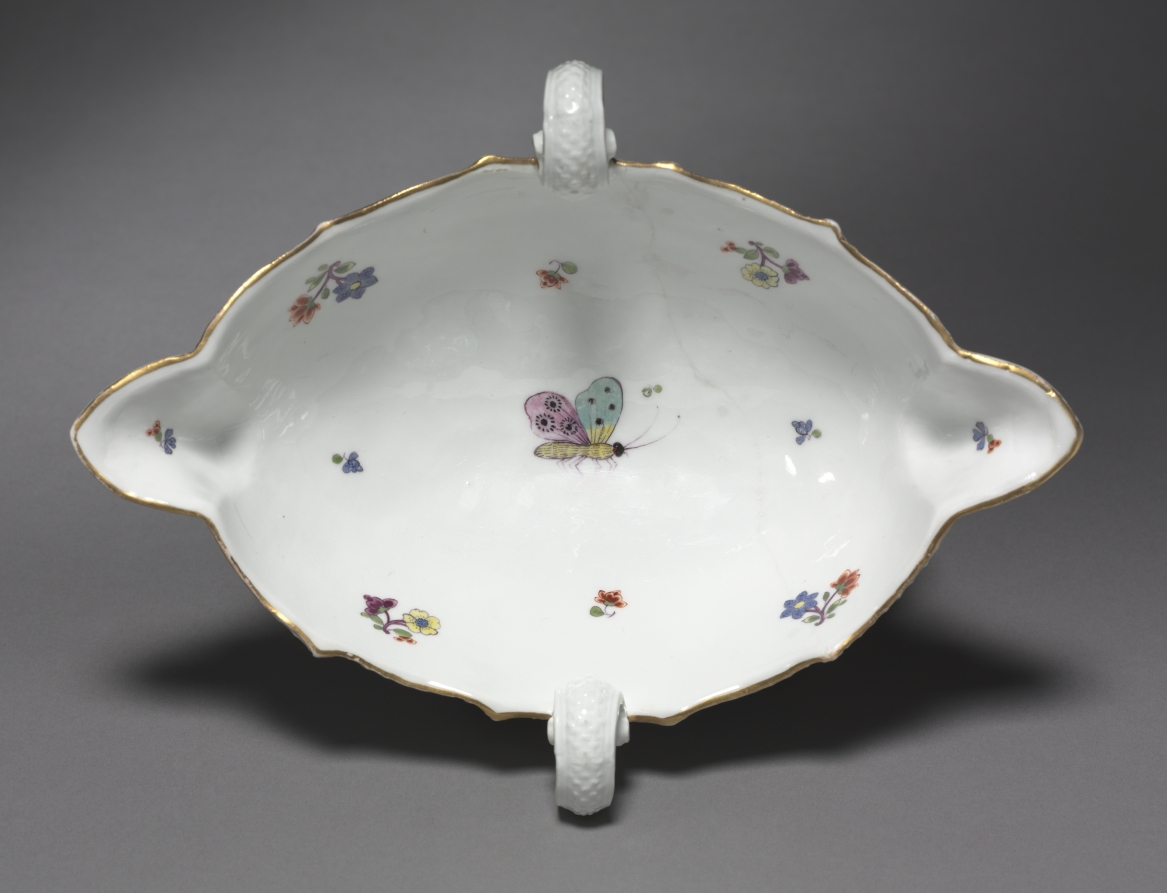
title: Sauceboat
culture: Germany, Meissen, Johann Joachim Kandler period 1735-56, 18th Century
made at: Meissen Porcelain Factory (German, est. c. 1710)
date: 1735–56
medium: porcelain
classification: Ceramic